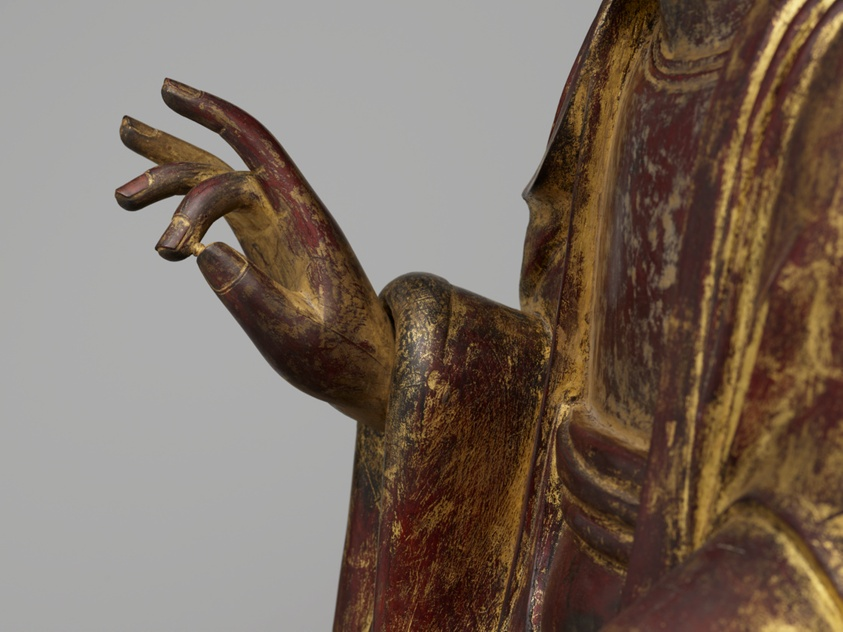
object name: Sculpture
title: Buddha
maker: Korea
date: Joseon dynasty (1392-1897), 18th century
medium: Lacquered wood with gilding, pigment, and glass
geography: Korea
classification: wood; sculpture; asian art